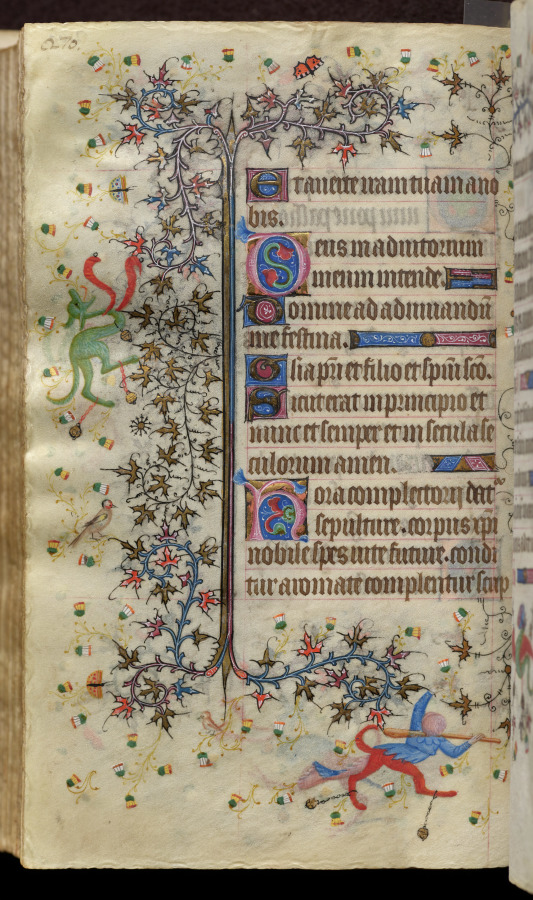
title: Hours of Charles the Noble, King of Navarre (1361-1425): fol. 135v, Text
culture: France, Paris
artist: Master of the Brussels Initials and Associates (French)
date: c. 1405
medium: ink, tempera, and gold on vellum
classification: Bound Volume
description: This precious volume was obviously highly prized by its owner, the French-born King of Navarre, who had his coat of arms painted on no less than twenty folios. Rather than directly commissioning this manuscript from a specific workshop, it seems that Charles the Noble acquired his book of hours -- perhaps ready-made for the luxury market -- while on a trip to Paris in 1404-05. A collaborative effort, six painting styles are evidenced within the pages of this codex, those of two Italians, two Frenchmen, and two Netherlanders. The painter who was responsible for the planning and decoration of the book, and who produced seventeen of the large miniatures, was a Bolognese artist known as the Master of the Brussels Initials. His principal assistant, responsible for most of the borders, was a Florentine who signed his name "Zecho" da Firenze on folio 208 verso.